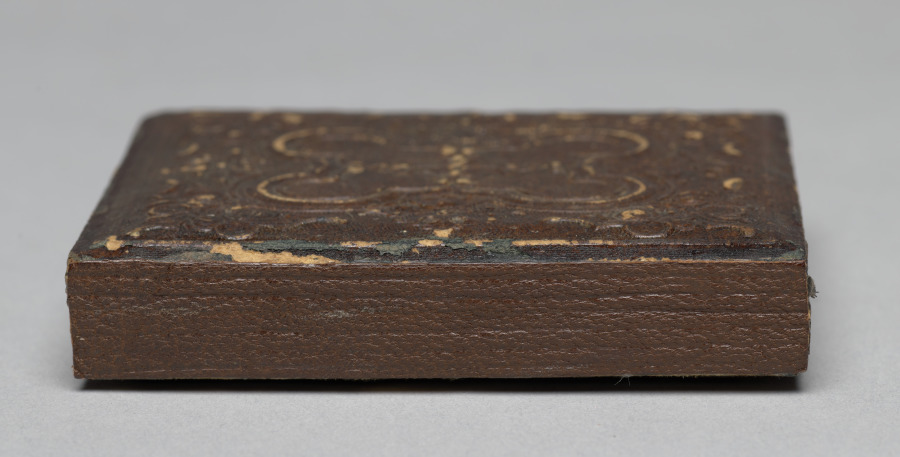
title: Child in off-shoulder polka dot dress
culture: America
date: c. 1860–65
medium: ambrotype, sixth plate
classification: Photograph